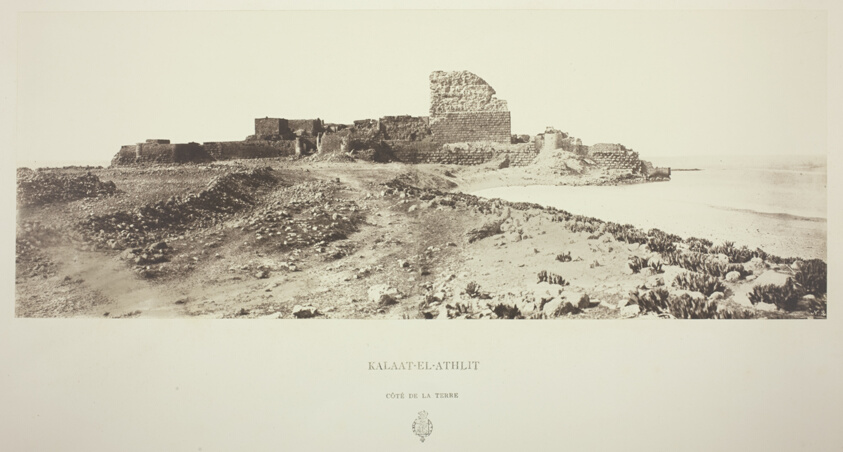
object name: Photograph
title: Kalatt-El-Athlit, Côté de la Terre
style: 19th century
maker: Louis De Clercq (French, 1836–1901)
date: c. 1860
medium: Albumen print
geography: France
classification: photography; albumen silver print; photograph